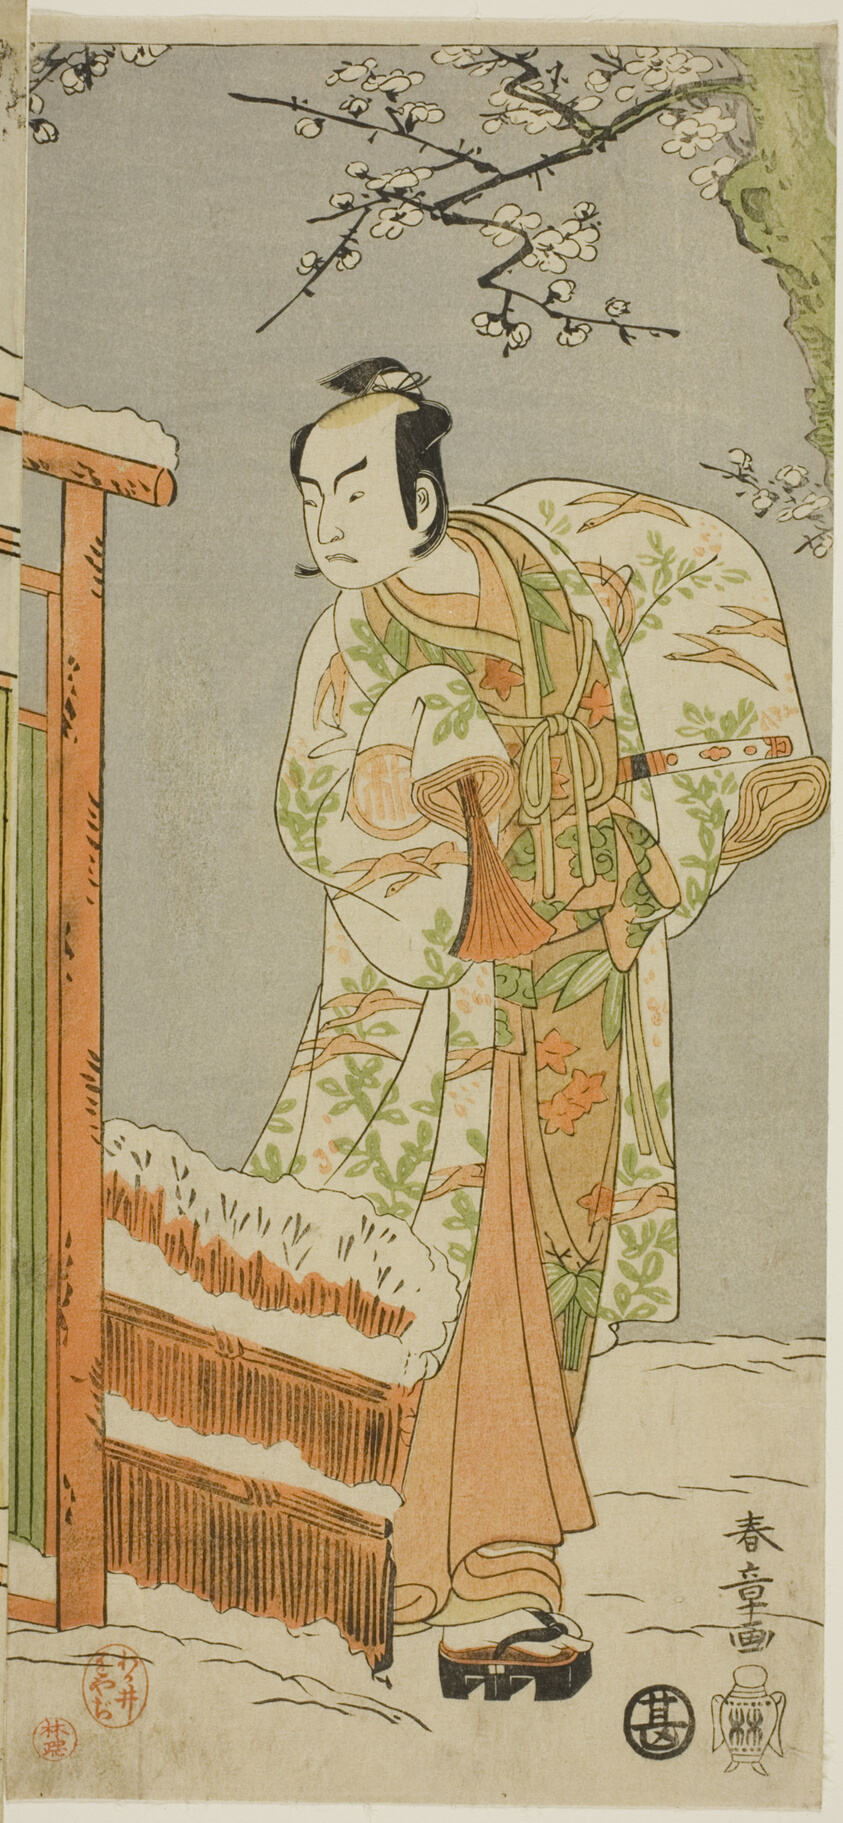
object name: Print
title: The Actor Arashi Sangoro II as Minamoto no Yoritomo in a dance interlude in scene two of the Joruri "Courtesan's Rouge on a Snow White Face (Oyama Beni Yuki no Sugao)" from the play "Cotton Wadding of Izu Protecting the Matrimonial Chrysanthemums (Myoto-giku Izu no Kisewata)," performed at the Ichimura Theater from the first day of the eleventh month, 1770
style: Japanese (culture or style)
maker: Katsukawa Shunsho 勝川 春章; Japanese, 1726-1792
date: c. 1770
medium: Color woodblock print; right sheet of hosoban triptych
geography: Japan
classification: woodblock print; print; asian art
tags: checkerboards, theatrical roles